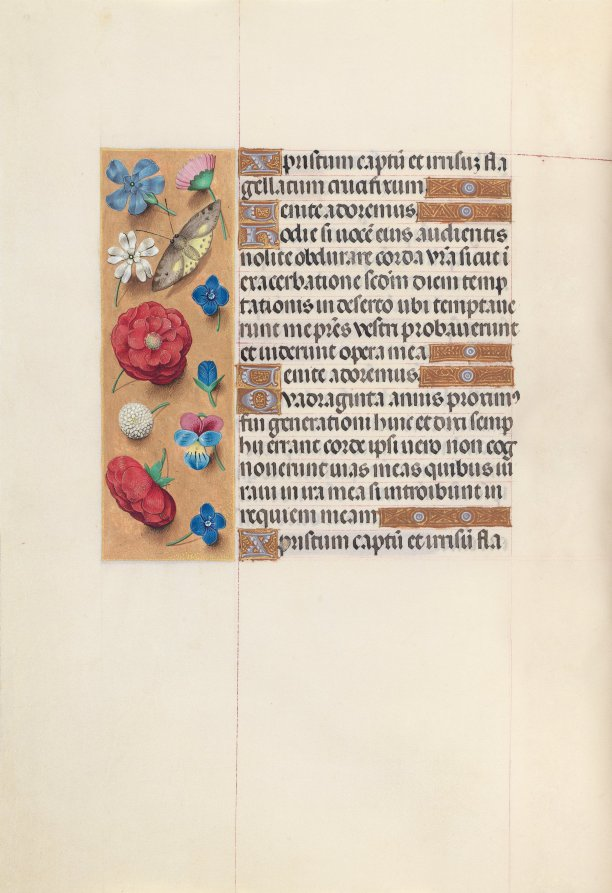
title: Hours of Queen Isabella the Catholic, Queen of Spain: Fol. 51v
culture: Flanders, Ghent and Bruges, late 15th century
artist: Master of the First Prayerbook of Maximillian (Flemish, c. 1444–1519)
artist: and Associates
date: c. 1500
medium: ink, tempera, and gold on vellum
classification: Bound Volume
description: This manuscript was illuminated by a circle of at least five highly organized manuscript painters active in the Flemish cities of Ghent and Bruges. The principal illuminator was Alexander Bening, who painted the majority of the book's miniatures. Manuscripts produced by this circle of artists are renowned for the decoration of their borders, which typically feature a rich variety of realistically-painted flowers, birds, and butterflies. This prayer book, called a book of hours, was intended not for a cleric, but for the private devotions of a lay person-in this case, Isabella the Catholic, Queen of Spain (1451-1504). Isabella's coat of arms embellishes the book's frontispiece. It is unlikely that the book was commissioned by the Queen herself; rather, she probably received it as a diplomatic gift from someone courting her patronage, perhaps Cardinal Francisco Jimenez de Cisneros. A Franciscan friar, Jimenez was dependent upon Isabella for his advancement, first to the post of Queen's confessor in 1492, and then to Archbishop of Toledo in 1495.